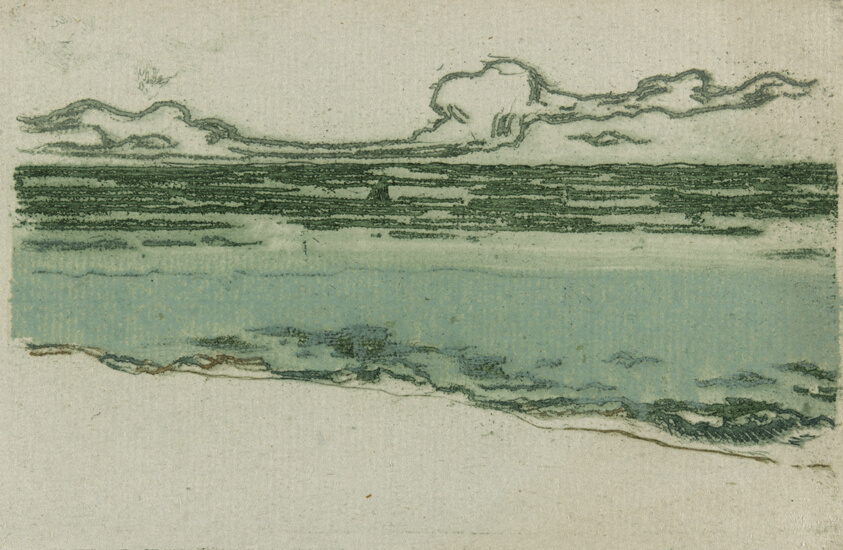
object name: Print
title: The Sea at Bognor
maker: Theodore Roussel (French, worked in England, 1847-1926)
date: 1895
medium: Etching, drypoint and softground in green and monotype in greenish blue on bluish ivory laid paper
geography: France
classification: etching; paper; print; prints and drawing